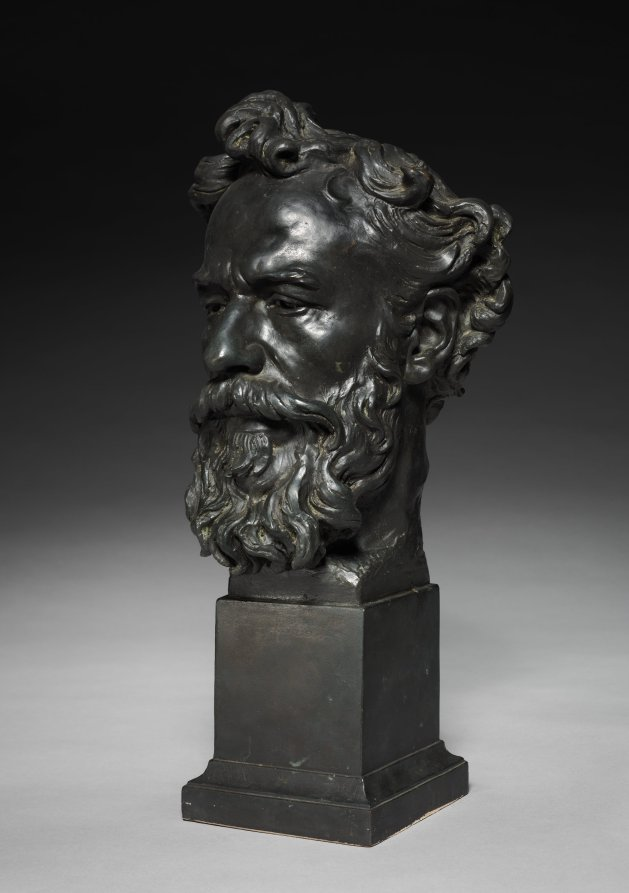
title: Head of Alphonse Legros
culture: France, 19th century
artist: Jules Dalou (French, 1838–1902)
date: c. 1876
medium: bronze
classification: Sculpture